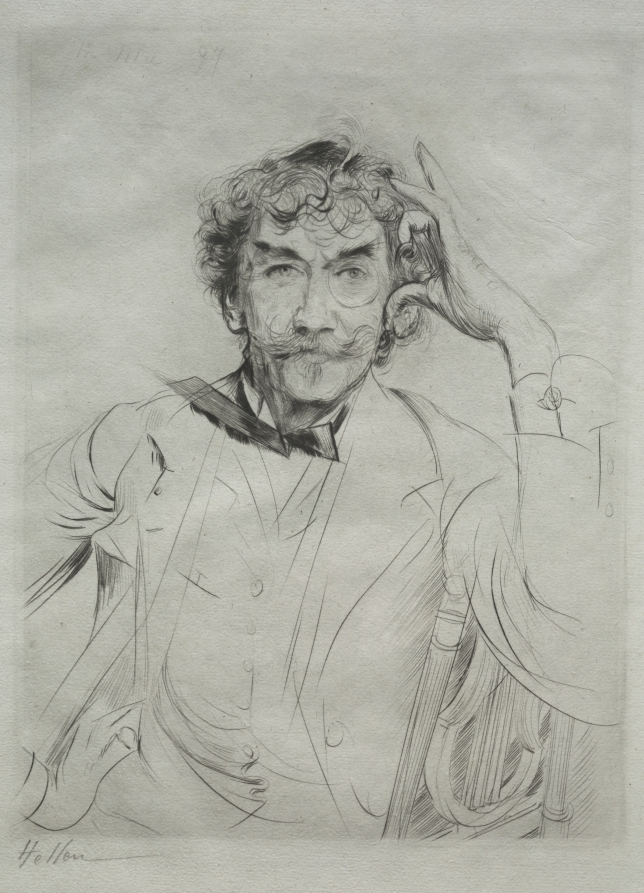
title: James MacNeill Whistler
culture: France, late 19th Century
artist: Paul César Helleu (French, 1859–1927)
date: 1897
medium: drypoint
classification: Print